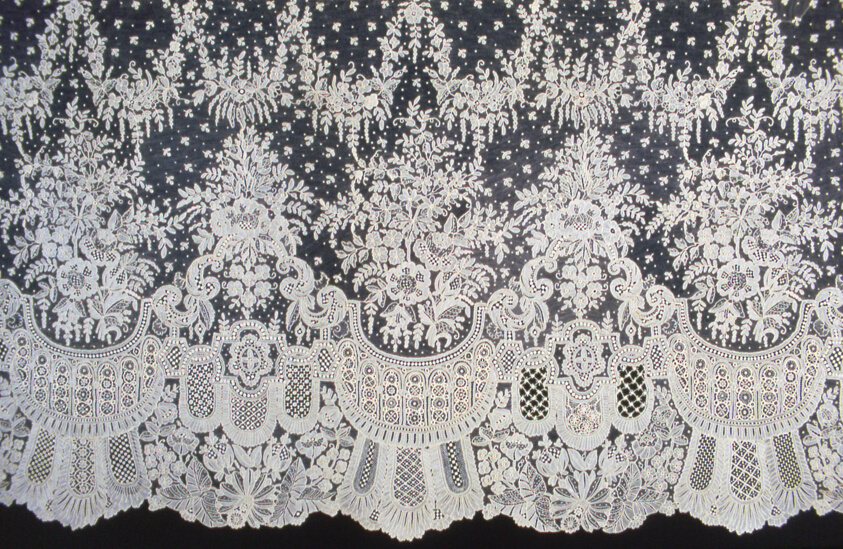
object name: Textile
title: Dress Flounce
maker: Belgium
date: 1860s (probably 1862 or 1867)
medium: Cotton, needle lace of a type known as "Point de Gaze"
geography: Belgium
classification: textile; lace - needle